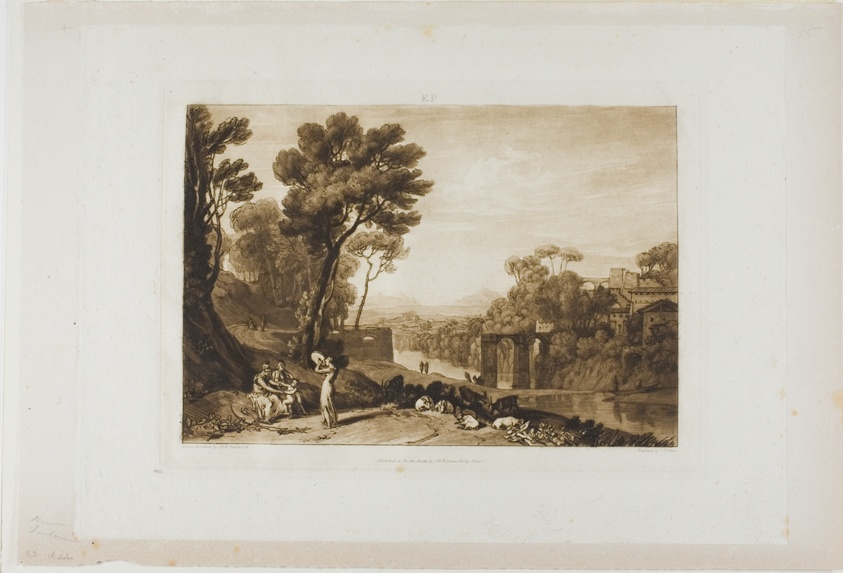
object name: Print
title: The Woman and Tambourine, plate 3 from Liber Studiorum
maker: Joseph Mallord William Turner (English, 1775-1851); Engraved by Charles Turner (English, 1773-1857)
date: published 1807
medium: Etching and engraving in brown on ivory wove paper, laid down on ivory laid paper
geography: England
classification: etching; print; prints and drawing